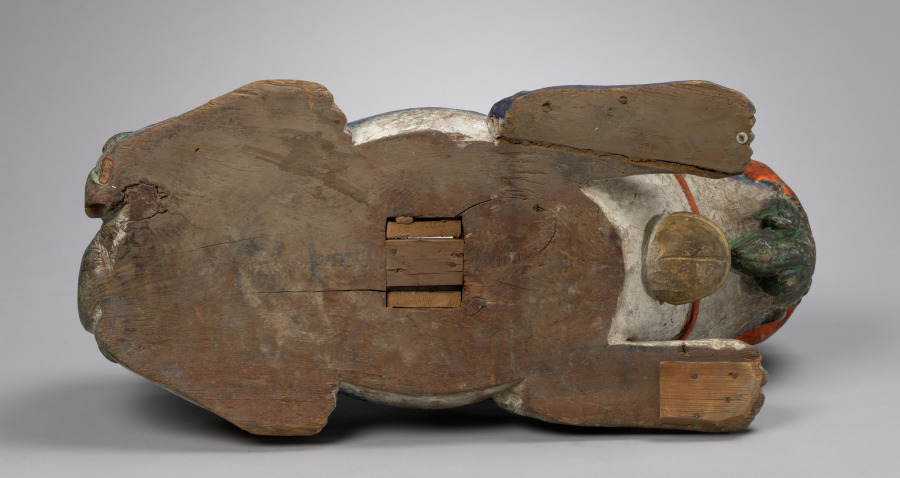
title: Base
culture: Korea, Joseon dynasty (1392–1910)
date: 1392–1897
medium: wood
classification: Arms and Armor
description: This wooden base for a musical instrument, possibly a set of bells or drums, was acquired in Korea in 1916 by Langdon Warner, who once served as the field agent for Asian art for the Cleveland Museum of Art. At the time of acquisition, it was mistaken as a part of a clothing stand related to a set of military uniform (1918.560.1) probably because the wooden base and a set of military uniform were purchased at the same antique shop.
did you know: It was a base of a musical instrument, such as a set of bells or drums.